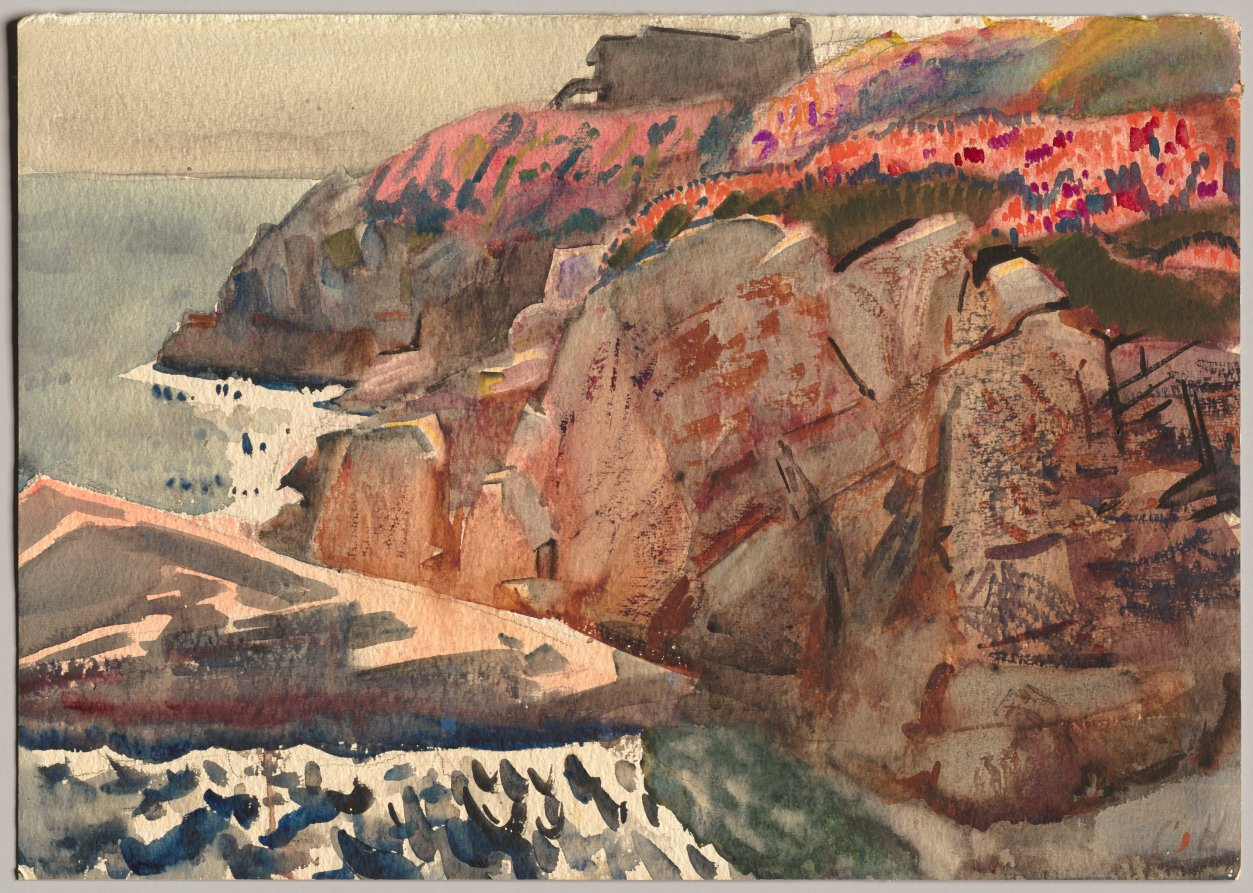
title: Cliffs, November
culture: America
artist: Charles Sydney Hopkinson (American, 1869–1962)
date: 1926–27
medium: watercolor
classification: Drawing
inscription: Signed "CH" in lower right